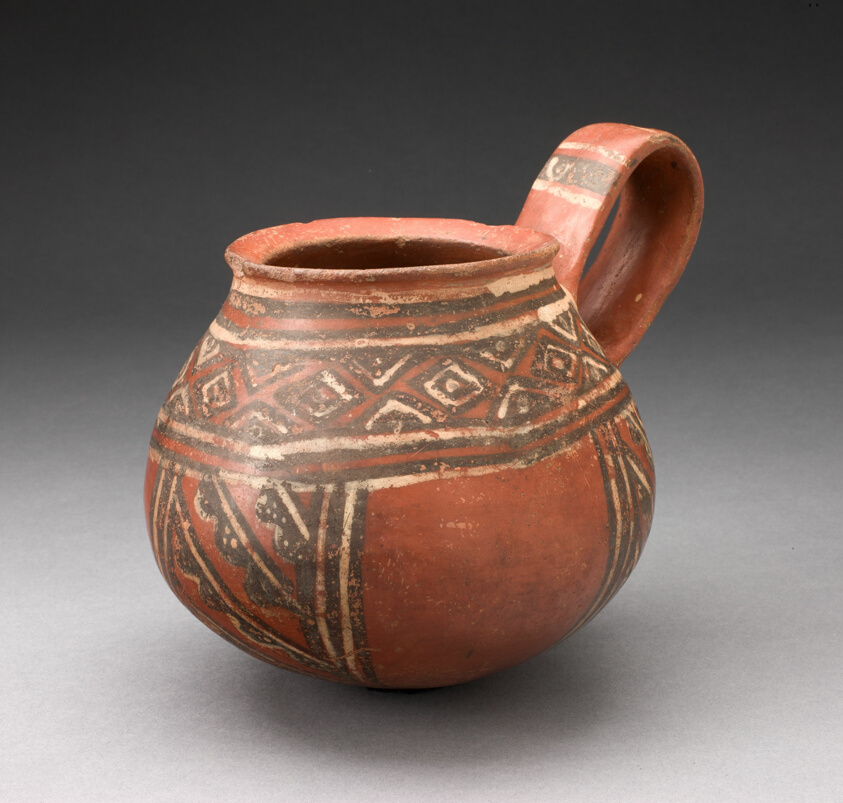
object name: Vessel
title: Miniature Single-Handled Jar with Textile-like Pattern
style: inca, late intermediate period, Pre-Columbian, americas, Arts of the Americas, andean, andes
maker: Inca (South coast or southern highlands, Peru)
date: 1450–1532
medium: Ceramic and pigment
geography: Southern Peru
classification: earthenware; ceramics; vessel; art of the americas